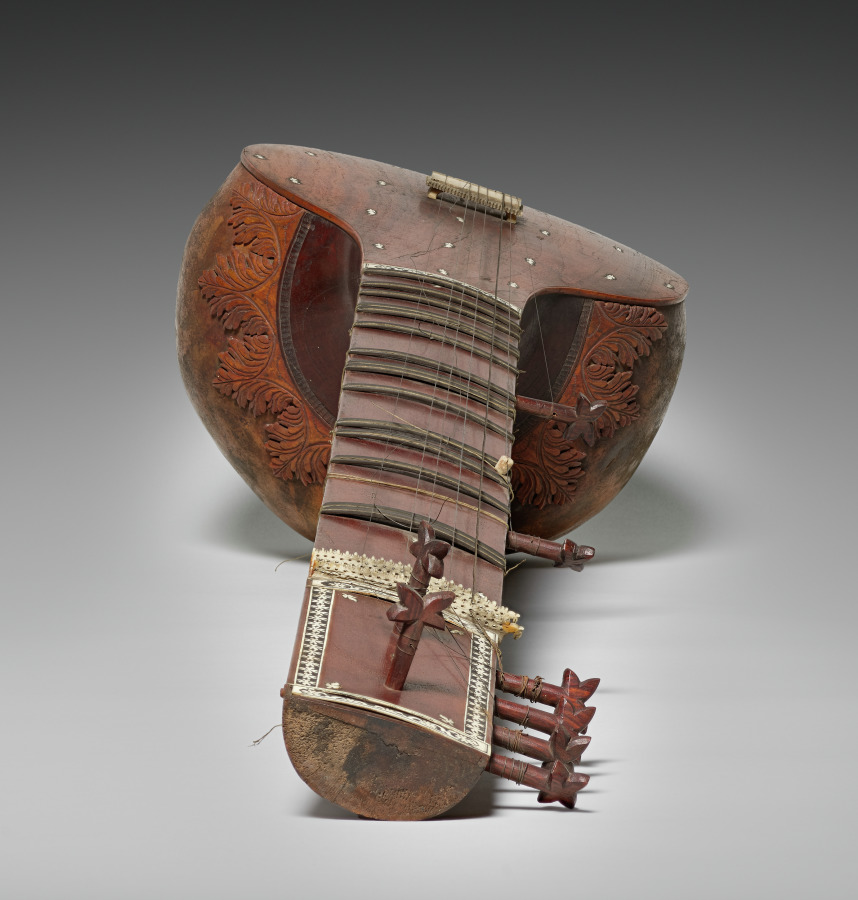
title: Sitar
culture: East India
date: 1800s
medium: Gourd, wood, ivory inlay, ebony? inlay, gut, and metal strings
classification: Musical Instrument